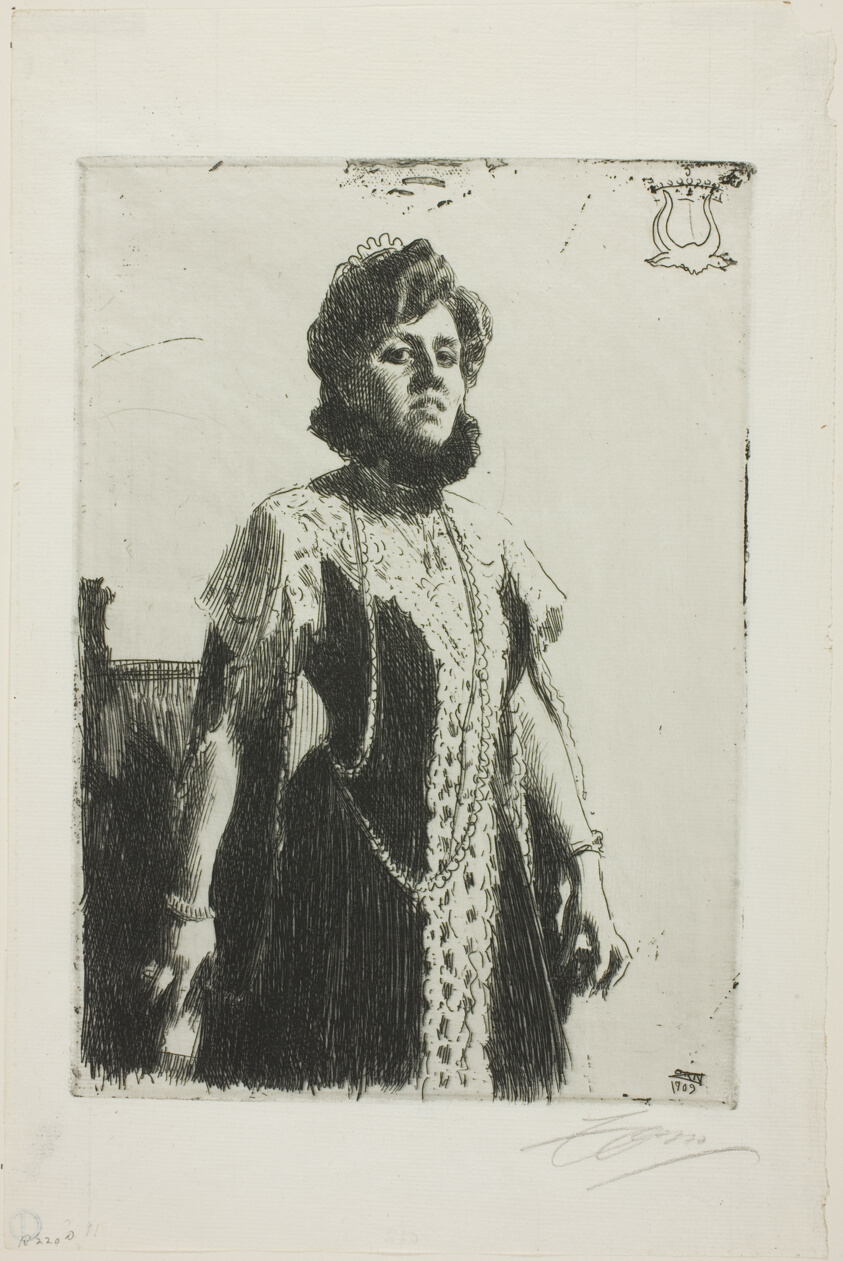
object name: Print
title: Oxenstierna (Mrs. Aurore Klintberg, née Oxenstierna, Whole length)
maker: Anders Zorn (Swedish, 1860-1920)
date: 1909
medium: Etching on ivory laid paper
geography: Sweden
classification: etching; print; prints and drawing